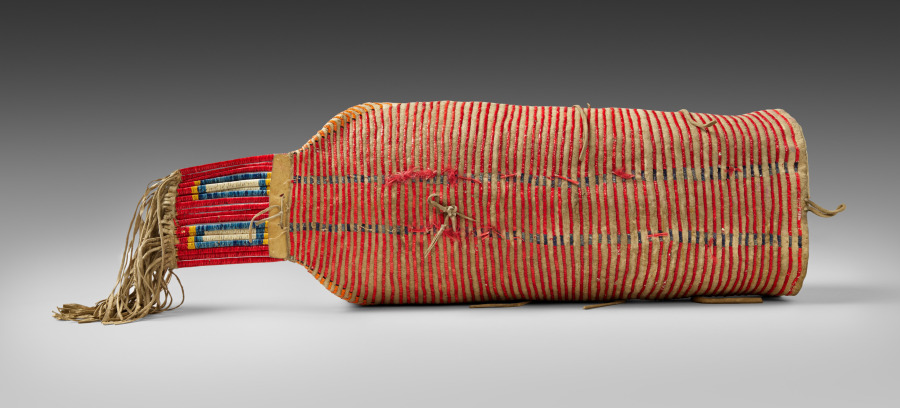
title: Cradle Board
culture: America, Native North American, Lakota (Sioux), Post-Contact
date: c. 1900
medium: leather, quills, beads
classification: Leather